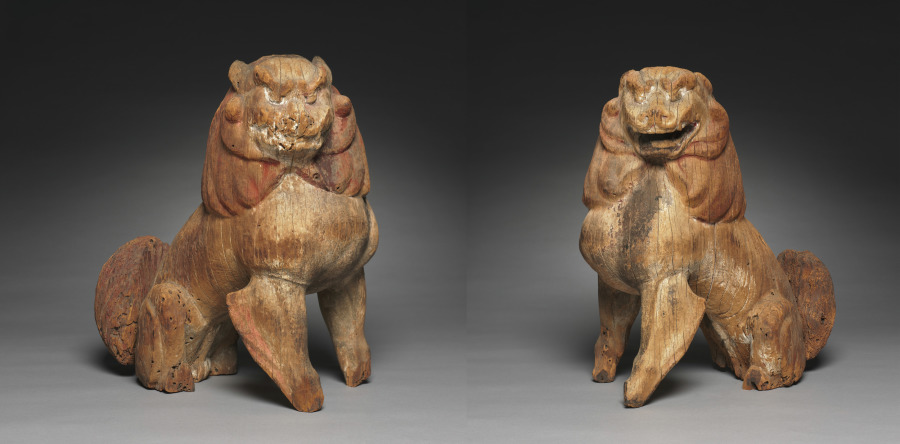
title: Pair of Guardian Animals: Karashishi and Komainu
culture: Japan, Kamakura period (1185–1333)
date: 1300s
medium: Wood with traces of color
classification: Sculpture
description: Placed at the entrance to shrines and temples in Japan, guardian figures ward off evil spirits. These guardians used to be painted red and white and are distinguishable by their facial expressions: the open-mouthed animal is a karashishi, or “Chinese lion,” while the close-mouthed beast, which once had a single horn protruding from its head, is called a komainu, or “Korean dog.” The mouths correspond to infinity, the syllables ah (open) and um (closed), or the alpha and omega. This pairing was widespread in ancient times in Chinese territories and likely found its way to Japan via kingdoms in Korea.